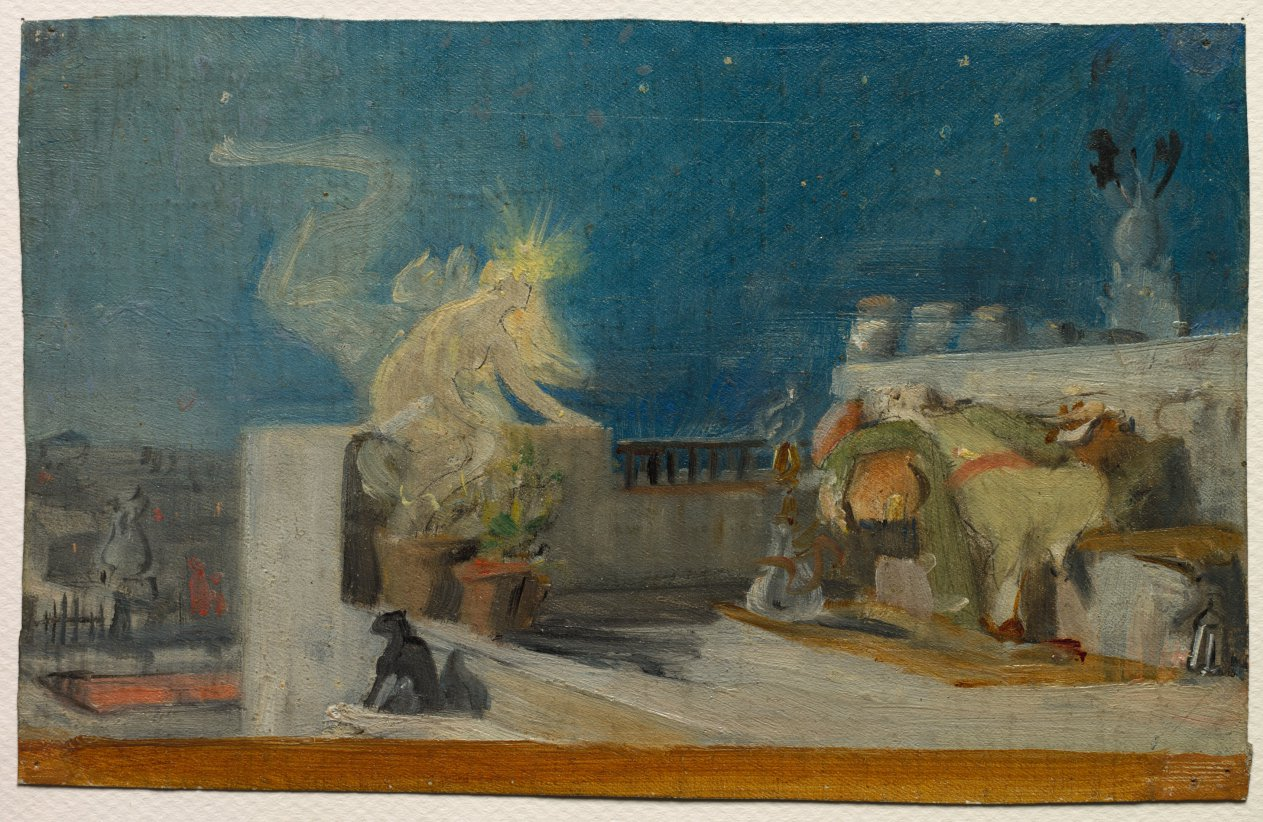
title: Sketch for "The Oriental Dream"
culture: France, 19th century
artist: Jean Lecomte du Nouÿ (French, 1842–1923)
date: before 1904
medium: oil on fabric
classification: Painting